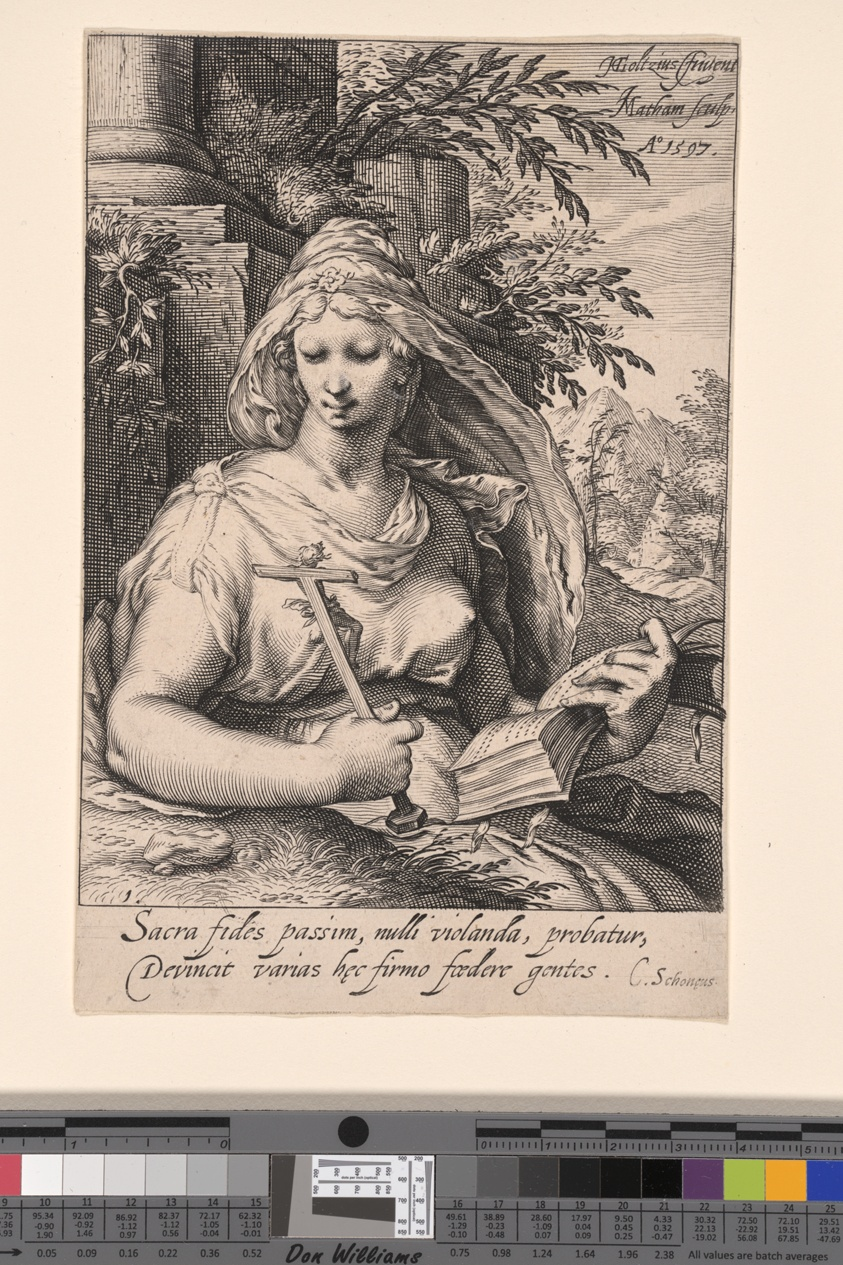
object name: Print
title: Faith, from The Seven Virtues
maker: Jacob Matham (Dutch, 1571–1631); after Hendrick Goltzius (Dutch, 1558–1617)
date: 1597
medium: Engraving on paper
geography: Netherlands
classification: engraving; paper; print; prints and drawing